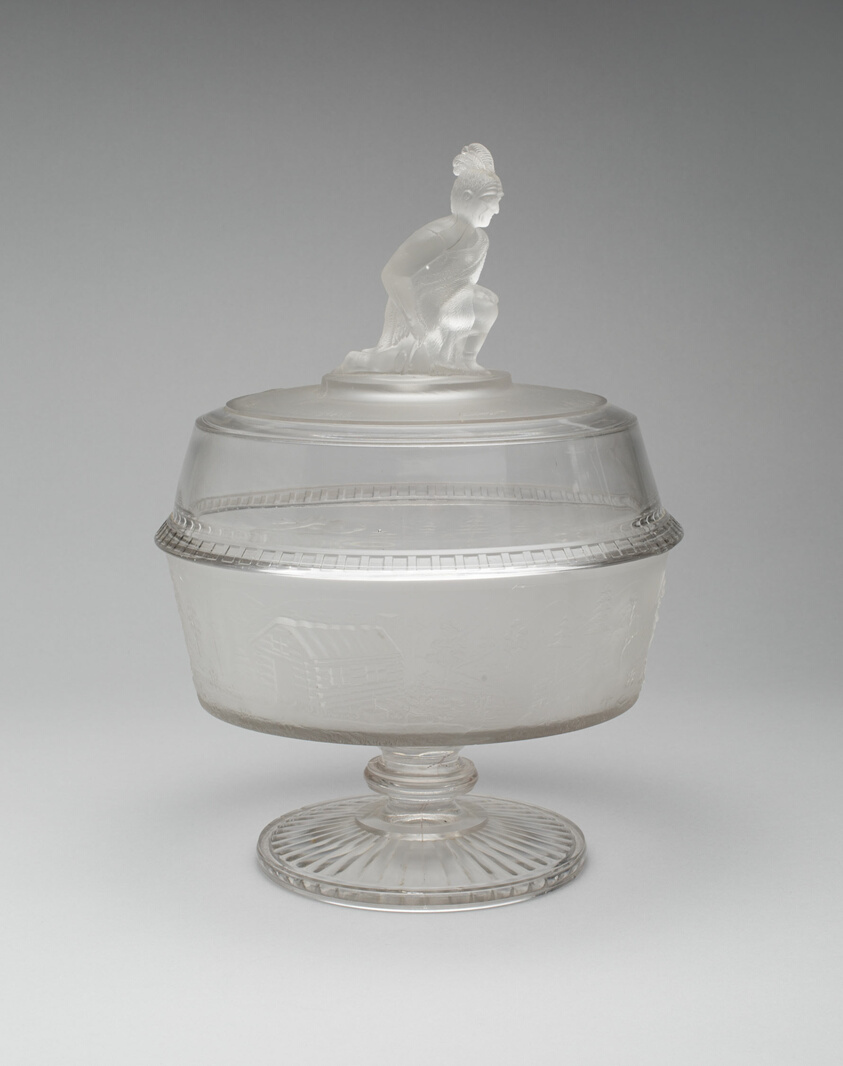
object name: Glass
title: "Westward Ho!/Pioneer" pattern covered footed compote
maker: Gillinder and Sons, 1861–c. 1930; Philadelphia or Greenbsburg, Pennsylvania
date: c. 1876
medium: Glass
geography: Philadelphia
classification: compote; glass; vessel for serving food; american decorative arts; american arts; decorative arts